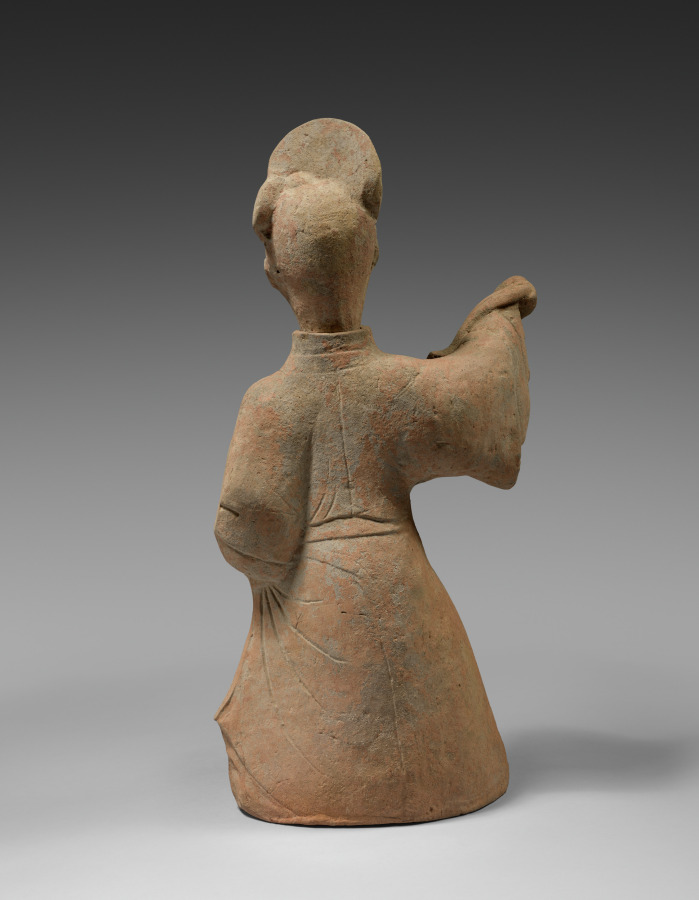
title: Female Figure of a Court Entertainer Dancing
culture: China, Sichuan province, Eastern Han dynasty (25–220 CE)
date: 100s CE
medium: Pottery with traces of color pigment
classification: Ceramic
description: During the Han era, tombs of the elite were provided with sculpted renditions of their earthly entourage, such as guardians or musicians, to signify their status in the afterlife. The female dancer with elaborate hairdo held by flower ornaments raises one arm holding her wide sleeve with one hand, while the other lifts her robe to reveal what appears to be a drum underneath her garment, her face smiling, all in a gesture of an entertainer.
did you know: The dancer lifts her robe to reveal what appears to be a drum underneath her garment.